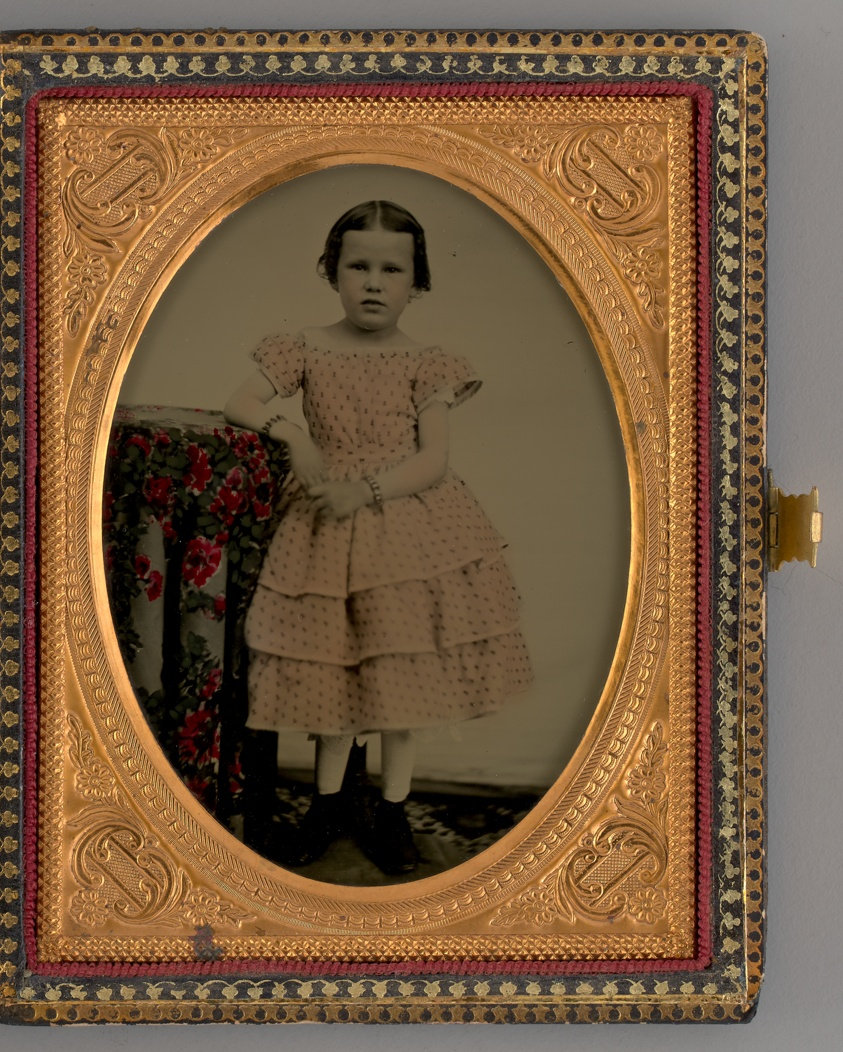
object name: Photograph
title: Untitled (Portrait of a Standing Girl)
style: 19th century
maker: Unknown maker; American, 19th century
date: 1865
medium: Ambrotype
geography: United States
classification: portrait; photograph; photographic process; photography; portrait; ambrotype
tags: lundberg collection, portrait, children, girls, portraits, portraits: child subject, portraits: female subject